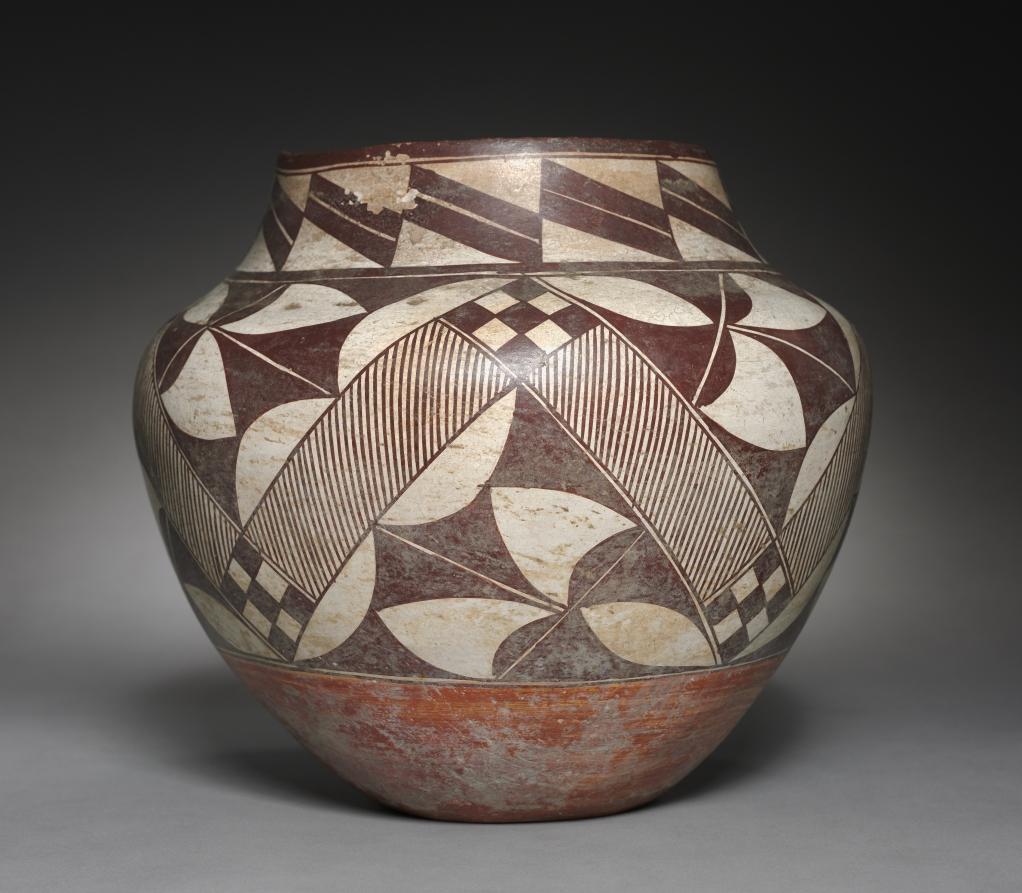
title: Water Jar (Olla)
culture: Native North America, Southwest, New Mexico, Acoma Pueblo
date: 1880s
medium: ceramic, slip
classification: Ceramic